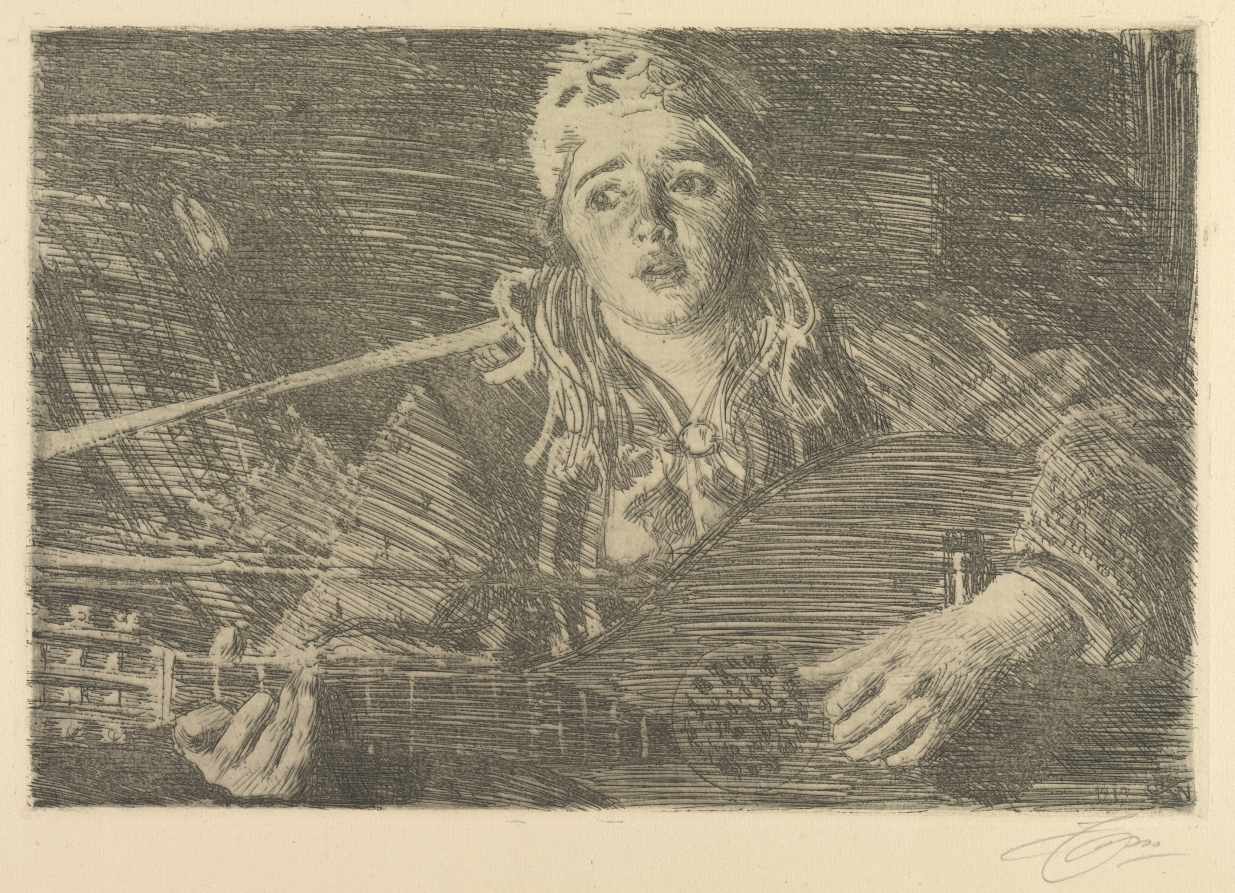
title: Ols Maria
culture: Sweden, 20th century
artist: Anders Zorn (Swedish, 1860–1920)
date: 1919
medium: etching and drypoint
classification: Print